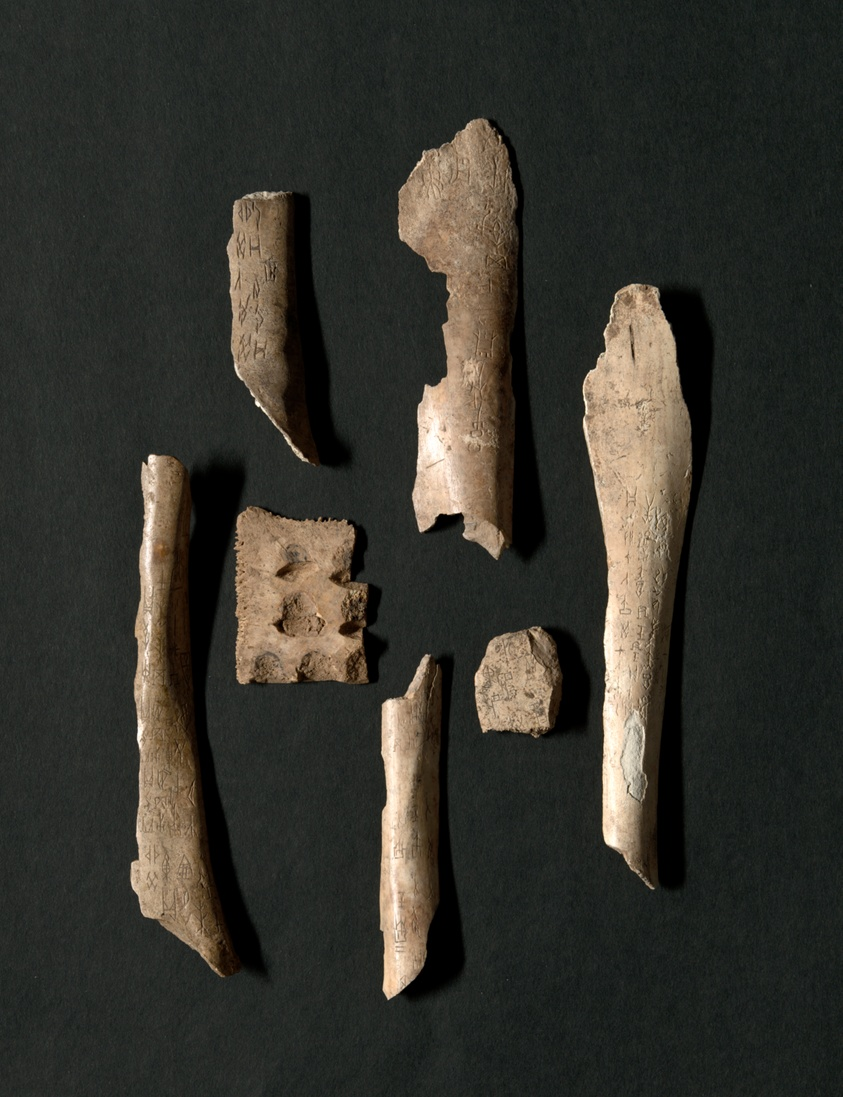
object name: Religious/Ritual Object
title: Oracle Bones (76 total)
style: Chinese (culture or style)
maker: China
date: Shang dynasty (about 1600–1046 BC)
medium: Segments of turtle plastrons and bones of oxen; polished, burned, and carved with inscriptions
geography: China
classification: ritual objects